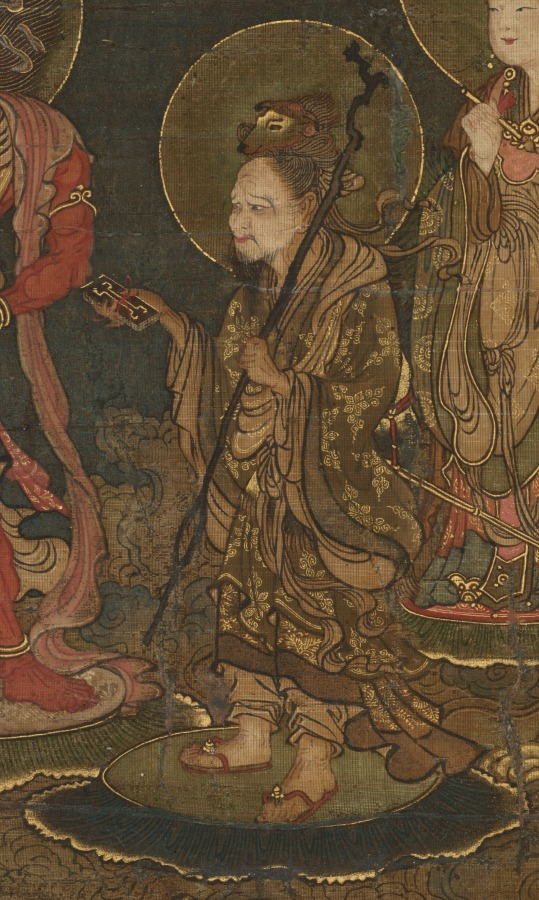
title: Descent of the Nine Luminaries and the Seven Stars at Kasuga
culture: Japan, Nanbokuchō period (1336–92)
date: mid- to late 1300s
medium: Hanging scroll; ink, color, gold and cut gold on silk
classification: Painting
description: This medieval religious painting shows celestial beings descending from the heavens into the Kasuga Shrine, a major religious site in Japan's ancient capital, Nara. The moon and the Kasuga mountain range appear in the uppermost portion of the painting, as does a red shrine entrance gate, or torii. In the upper part of the painting, figural representations of the stars in the constellation known as the Big Dipper in the West descend from right to left on cloud banks. In the lower part, the Nine Luminaries (Sanskrit: Navagraha) that emerged from the Vedic tradition—the sun and moon; the planets Jupiter, Mars, Saturn, Venus, and Mercury; and personifications of the fluctuating lunar nodes—descend in similar fashion. The painting uses the "deities in descent" scheme originating in China, as well as the original Buddhist form mandala (Japanese: honjibutsu mandarazu) format prevalent in medieval Japanese Shinto-Buddhist painting, to generate an image connected to the worship of celestial bodies in Esoteric Buddhism.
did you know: A 19th-century copy of this painting in ink and light color exists at the Kyoto City University of Arts.